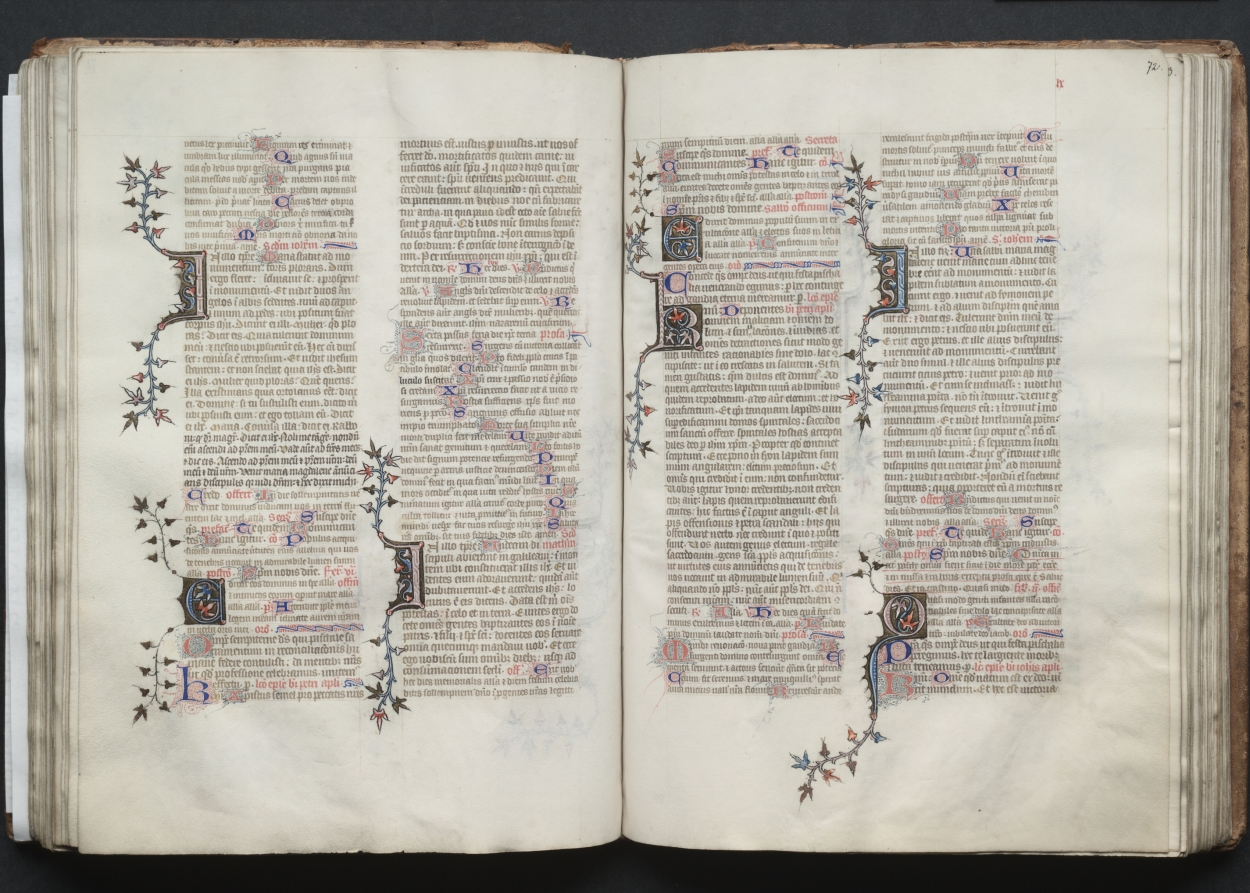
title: The Gotha Missal: Fol. 72r, Text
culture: France, Paris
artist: Master of the Boqueteaux (French)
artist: and Workshop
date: c. 1375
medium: ink, tempera, and gold on vellum; blind-tooled leather binding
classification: Bound Volume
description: The style and quality of this manuscript's decoration is typical of deluxe Parisian books made for aristocratic or royal patrons. Most of the book's decoration appears to be the work of the Master of the Boqueteaux, an artist active at the court of King Charles V (died 1380). His style was apparently shared by a number of book illuminators working in and around Paris. It is very possible that the Gotha Missal belonged to Charles V, but is not provable because the manuscript has no royal portraits and lacks a colophon. Given the book's magnificent decoration, however, it would seem that it was produced for a Valois prince, if not for the king himself. The manuscript receives its name from the German dukes of Gotha, its later owners.